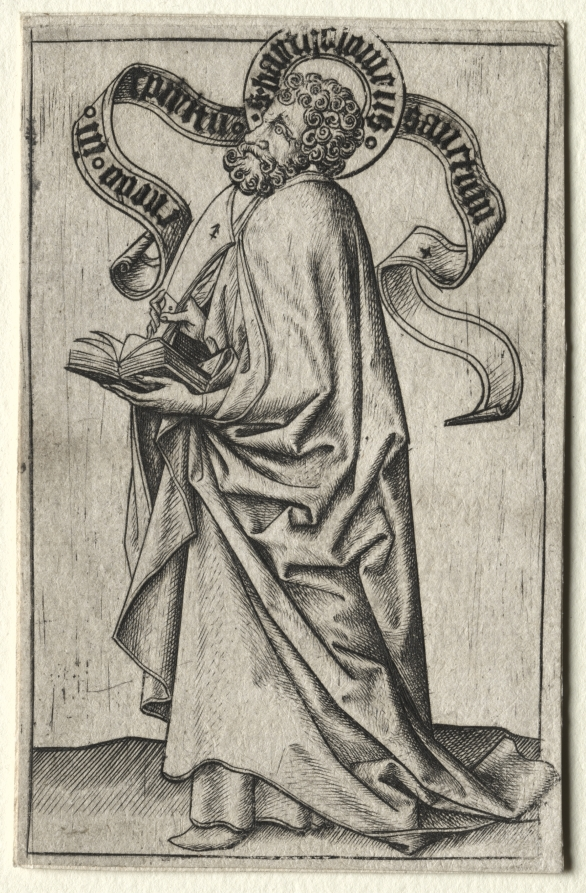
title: Saint Bartholomew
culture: Germany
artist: Master ES (German, active 1450–67)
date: 1450–67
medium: engraving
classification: Print